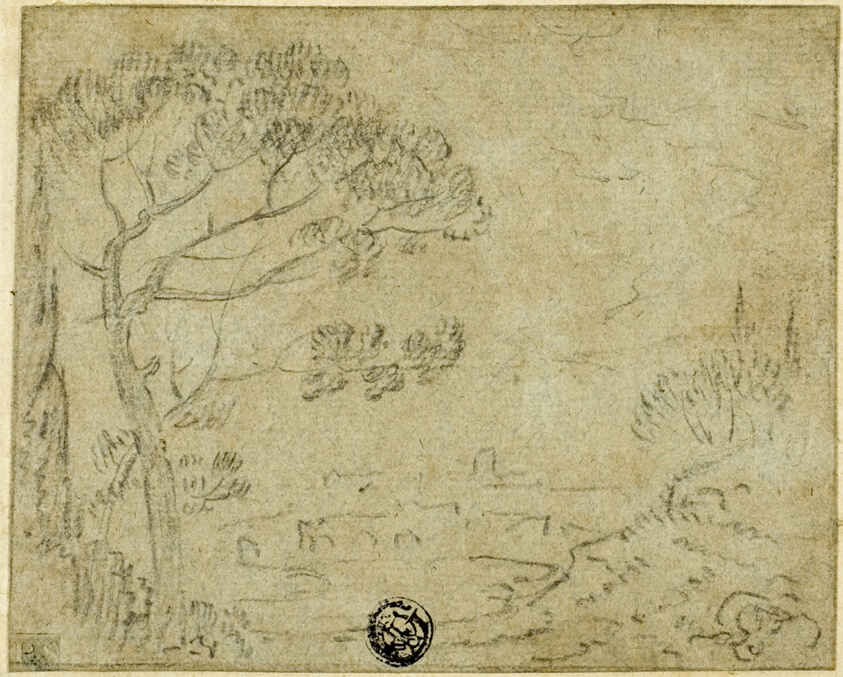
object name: Drawing and Watercolor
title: Italian Landscape with Umbrella Pine in Foreground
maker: Richard Wilson (English, 1714-1782)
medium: Black chalk on blue laid paper, laid down on ivory laid paper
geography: England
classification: chalk; drawings (visual works); prints and drawing